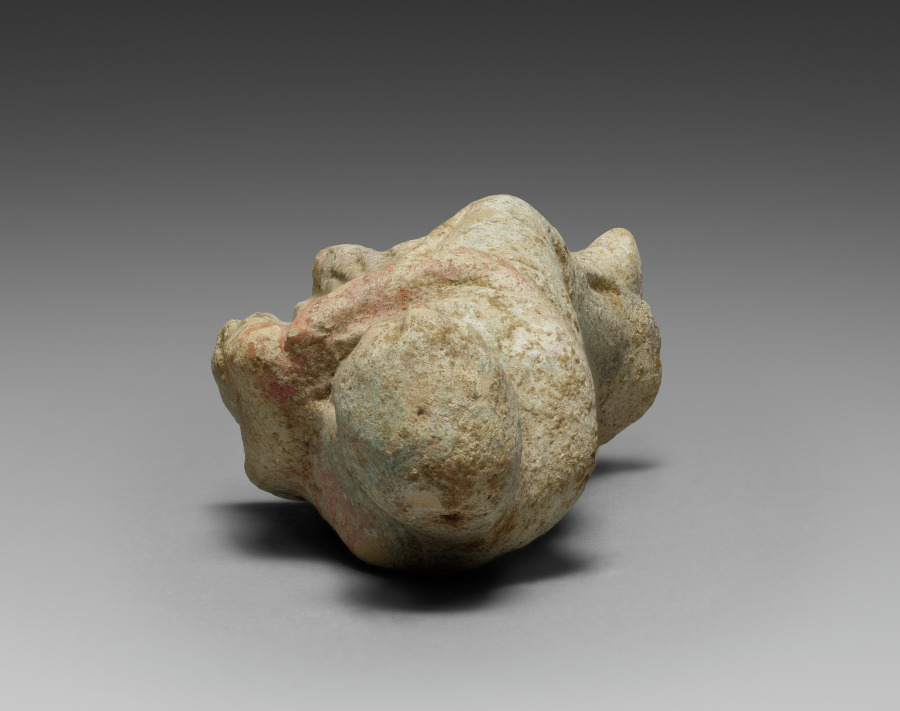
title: Figurine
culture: South Italy, Tarentum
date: 300–100 BCE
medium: terracotta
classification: Sculpture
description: Terracotta figurines like this one were popular throughout the ancient Mediterranean. This statuette takes the shape of a woman wearing a cloak or himation that twists around her form as she pulls it toward her left shoulder. Pigment is preserved in patches of red on the fabric over her arm. The figurine is mold-made, but only the front of the figure is modeled.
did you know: In ancient Greek art and literature, veiling the head or face was often a sign of αίδως (aidos), modesty or shame.